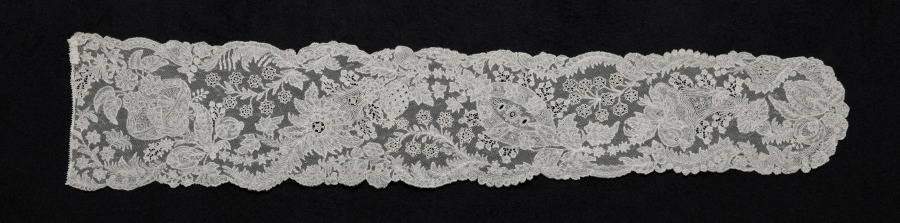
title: Lace Lappet (one of a pair)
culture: Belgium, Brussels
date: 1730–50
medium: Linen: needle and bobbin (Point d'Angleterre) lace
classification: Lace